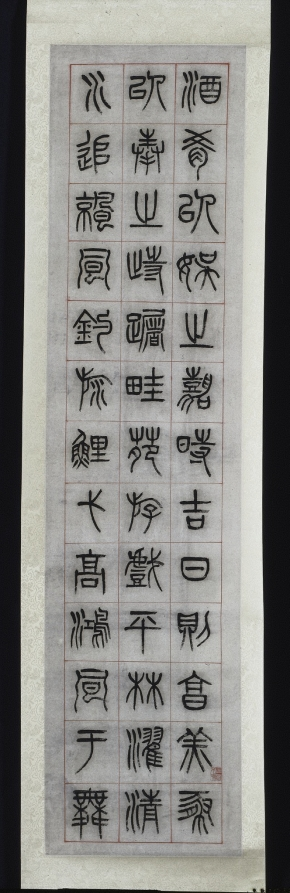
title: On Happiness, Calligraphy in Seal Script Style (zhuanshu)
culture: China, Changsu, Qing dynasty (1644-1911)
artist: Yang Yisun (Chinese, 1813–1881)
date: 1871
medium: hanging scroll, ink on paper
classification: Painting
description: Yang Yisun transcribed this ancient text on six narrow scrolls, starting at the top right and ending at the bottom left. Yang emphasizes the text’s historic nature by using the seal script style found on stone steles and bronze vessels. On Happiness features reflections of a scholar on a leisurely life in the countryside, composed by Han dynasty official Zhongchang Tong, who died the year the Han dynasty collapsed (AD 220). The idyllic life described in the text may bean evocation of the past in a time of national crisis. A decade before Yang wrote these scrolls, Anglo-French forces had looted and burned the Summer Palace in Beijing. At the same time, the domestic Taiping rebellion (1850–64), led by a religious fanatic to overthrow the Qing government, had devastated Yang’s homeland, the Jiangnan region, with an estimated 20 million lives lost.